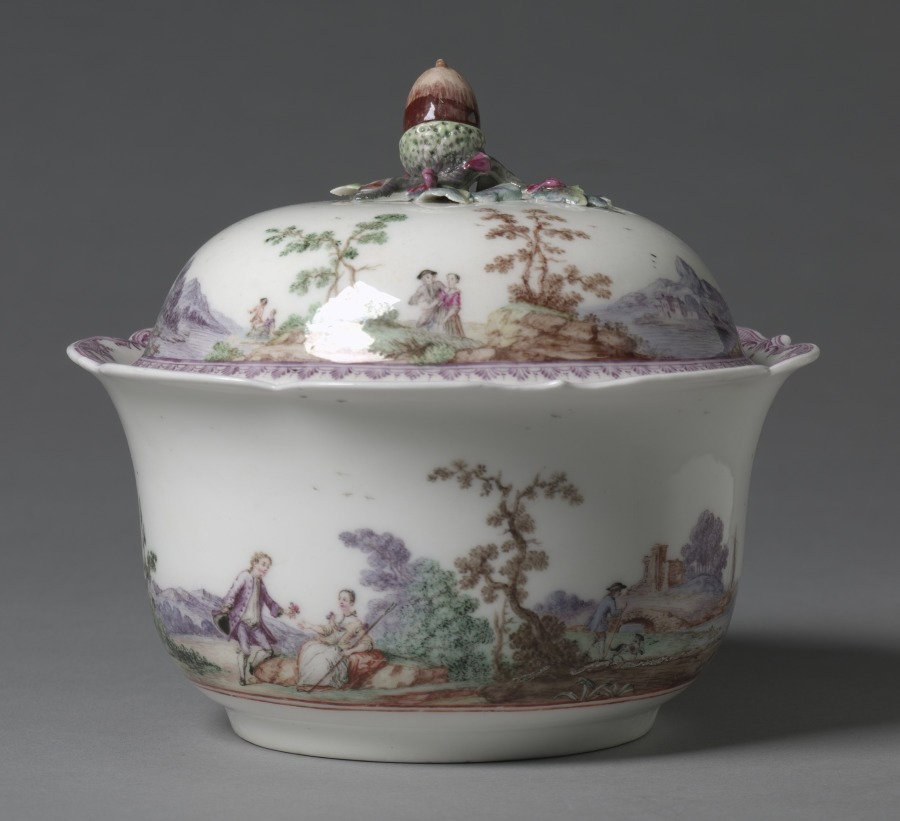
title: Covered Sugar Bowl (Pot à sucre)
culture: France, Vincennes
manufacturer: Vincennes Porcelain Manufactory (French, 1740–1756)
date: 1745–48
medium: soft-paste porcelain with enamel decoration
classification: Ceramic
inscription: In red on bottom of bowl: P.M. In red on interior of lid: P.M. 16 4.8B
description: This covered bowl, likely intended for sugar, is one of the earliest surviving examples of Vincennes porcelain, a reputed French factory moved to Sèvres in 1756. The continuous landscape is painted on this object en pointillé, a method by which a painter forms images with tiny dots. This style may have been influenced by their German competitors at the Meissen Porcelain Factory.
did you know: Three separate shades of purple, one of the most expensive colors to produce on porcelain during this time, are used extensively in this object’s paintings.